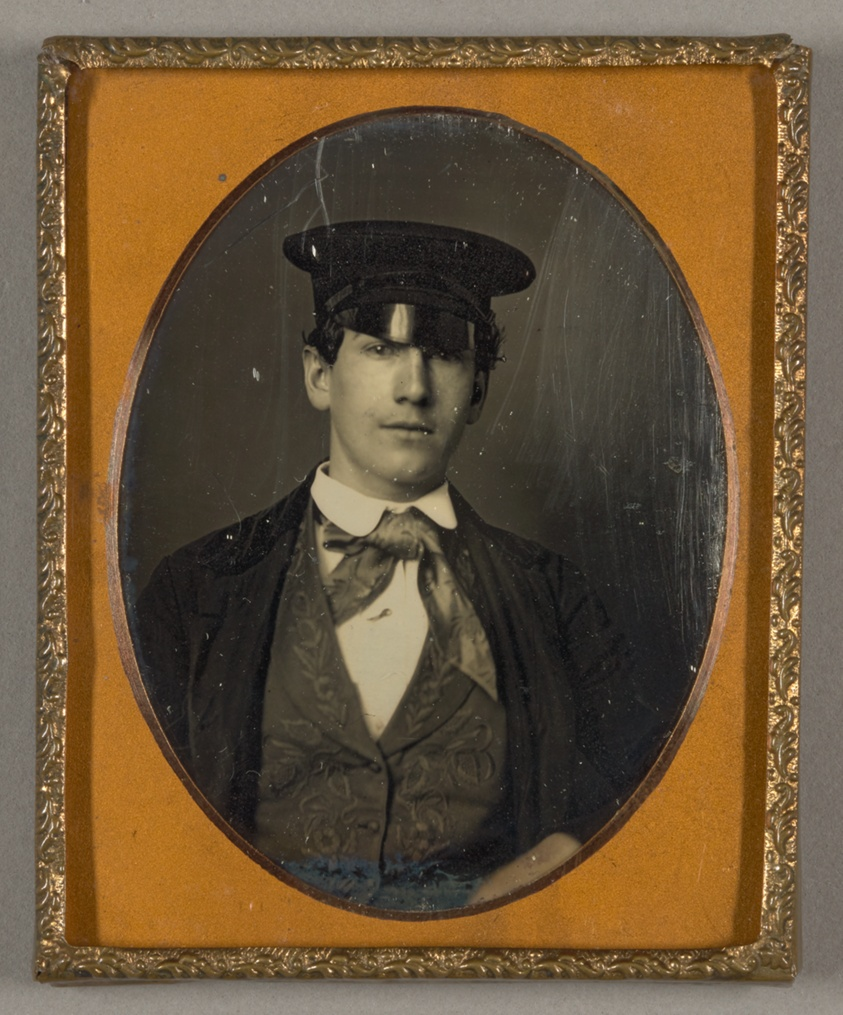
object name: Photograph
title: Untitled (Young Man with Hat)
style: 19th century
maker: Artist unknown; Probably American, 19th century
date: 1839/60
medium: Daguerreotype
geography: United States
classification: photographic process; photography; photograph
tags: Collected by Hugh Edwards